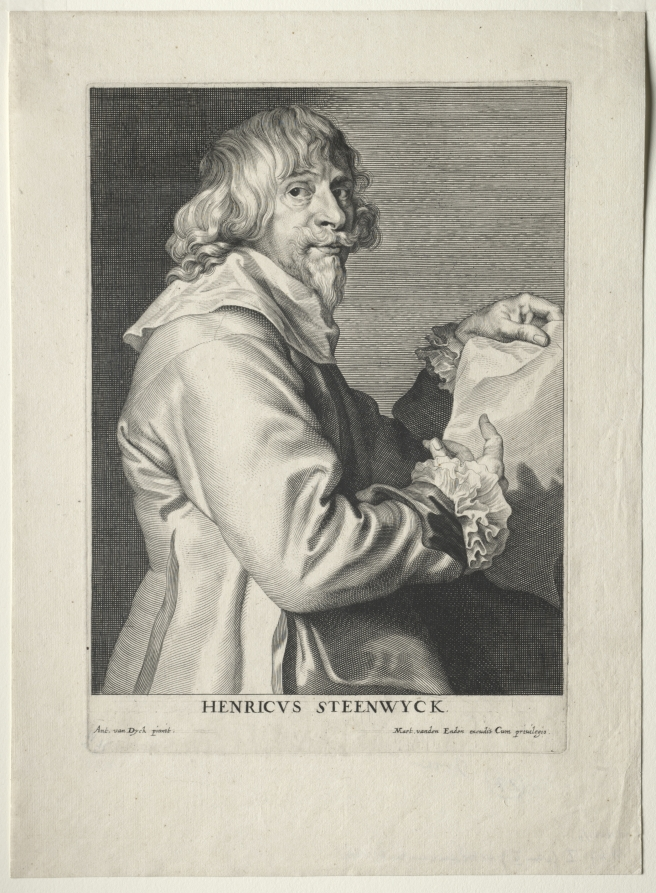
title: Portrait of Henri van Steenwyck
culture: Flanders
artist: Paulus Pontius (Flemish, 1603–1658)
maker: after Anthony van Dyck (Flemish, 1599–1641)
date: 1600s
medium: engraving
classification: Print